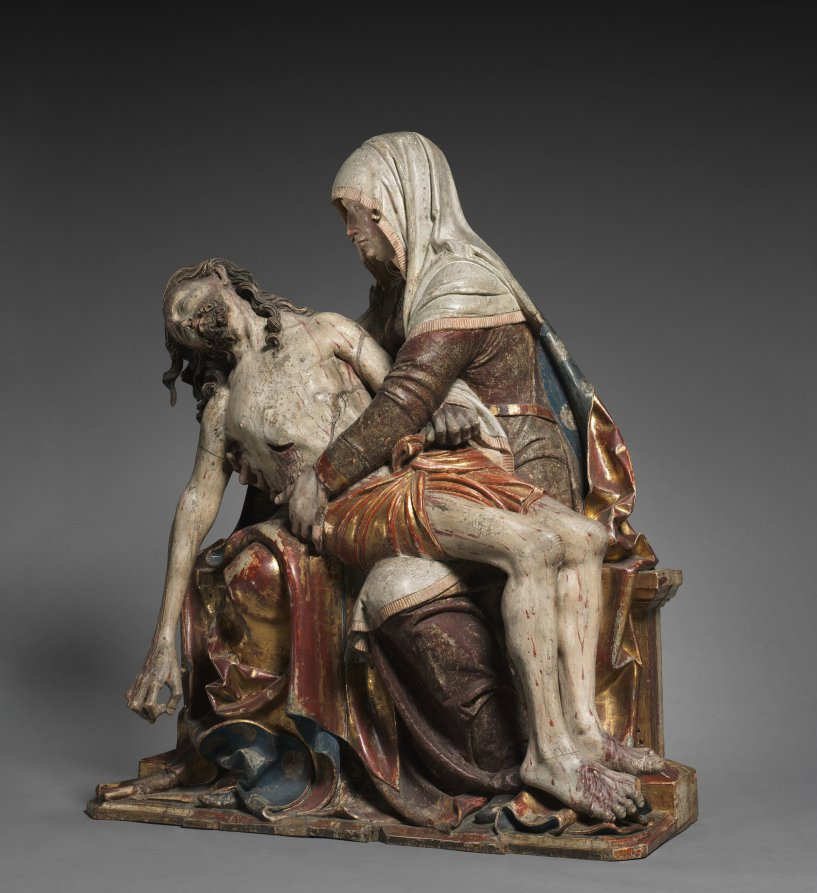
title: Vesperbild (Pietà)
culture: Germany, Upper Bavaria, 16th century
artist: Master of Rabenden (German)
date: c. 1515–20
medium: lindenwood, polychromed and gilded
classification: Sculpture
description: Depicting the Virgin cradling Christ’s dead body, works like this one were known in German as vesperbilds, owing to their incorporation into the liturgy of the evening prayer (vespers) on Good Friday. The word pietà—from the Latin pietas, meaning "piety" or "compassion"—was also used to describe such works. Like other devotional image types that emerged in southern Germany in the later medieval period, vesperbilds encouraged viewers to contemplate Christ’s suffering and empathize with the Virgin’s sorrows more directly and emotively than ever before. This anonymous German artist is named after one of his most important works, the high altar of the church of Rabenden in the Chiemgau, the foothills of the Alps. The sculpture was likely placed in a secondary chapel in a Bavarian church.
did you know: This sculpture sensitively depicts the Virgin cradling the body of Christ. This devotional image was likely placed near the altar in a German chapel. Imagine standing in a small, quiet chapel looking up at these lifelike figures with flickering candles casting dappled light onto their surface.